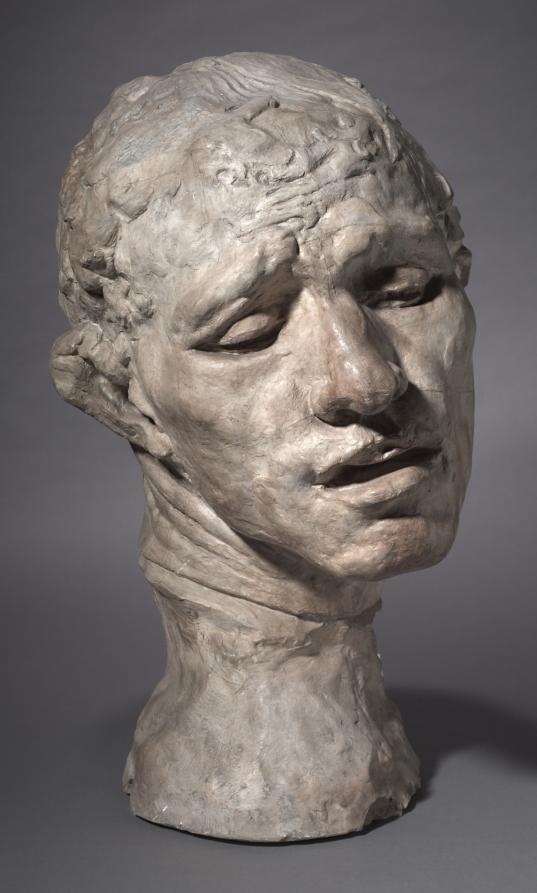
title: Heroic Head of Pierre de Wissant, One of the Burghers of Calais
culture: France, late 19th-early 20th Century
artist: Auguste Rodin (French, 1840–1917)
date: 1886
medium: plaster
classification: Sculpture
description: This sculpture depicts one of the figures in Rodin’s large public monument The Burghers of Calais (1884–89), featuring six French men who volunteered to be taken prisoner by the English in exchange for lifting the siege of Calais during the Hundred Years War (1337–1453). Pierre de Wissant’s anguished expression suggests extreme mental suffering as he contemplates his expected execution. Rodin exhibited a life-size version of the figure as an independent work before completing the monument. He later made multiple versions in various sizes and media. This plaster features a highly expressive, hand-worked surface inscribed in places with graphite and covered with delicate, tinted washes.